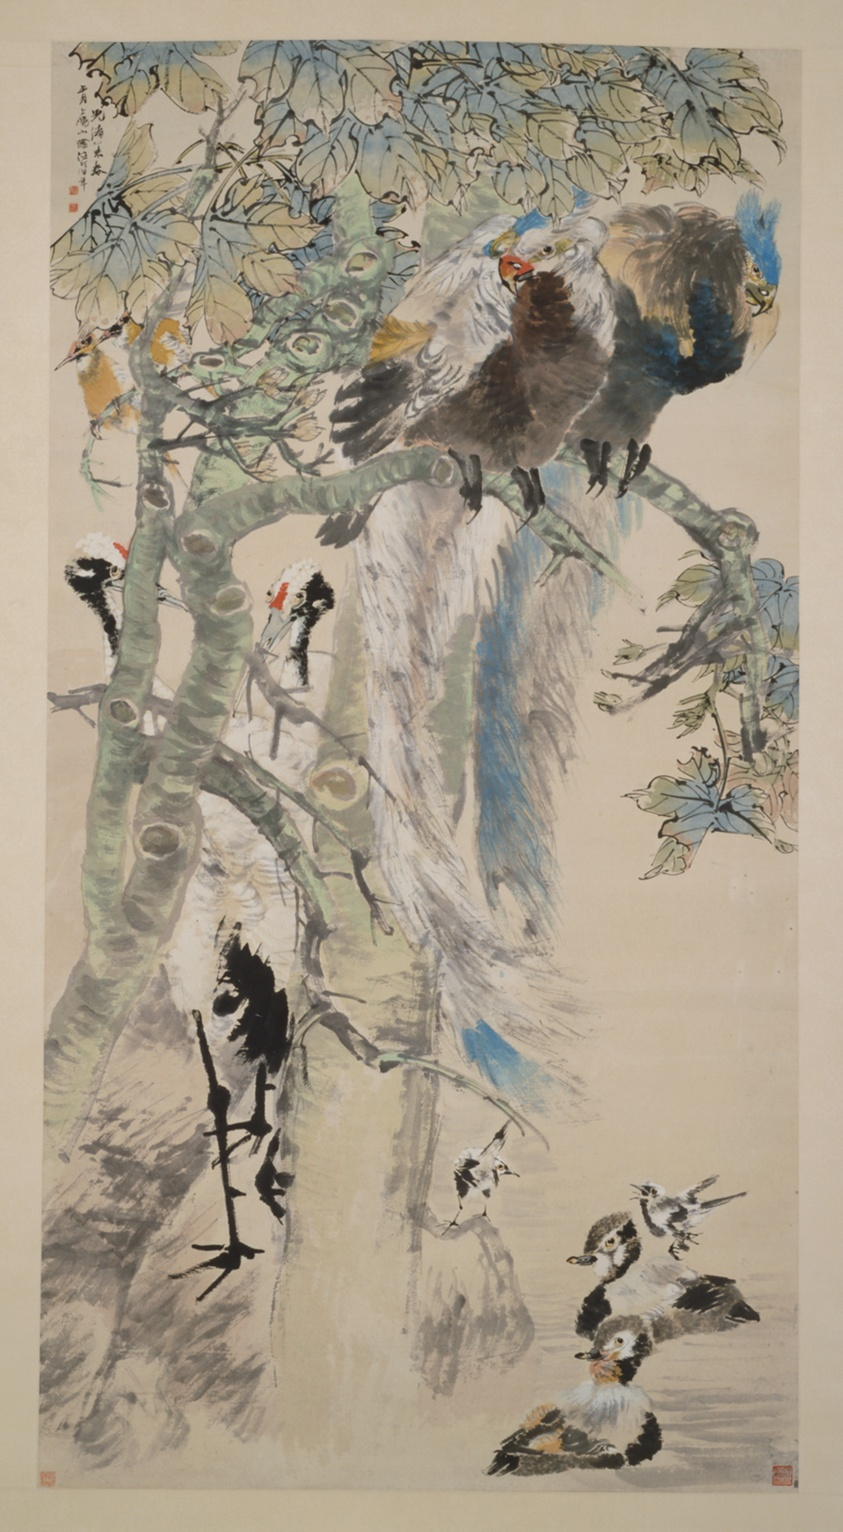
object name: Painting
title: The Five Virtues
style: Chinese (culture or style)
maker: Ren Yi (Chinese, 1840-1895)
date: Qing dynasty (1644–1911), 1895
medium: Hanging scroll; ink and colors on paper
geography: China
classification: hanging scroll; painting; asian art